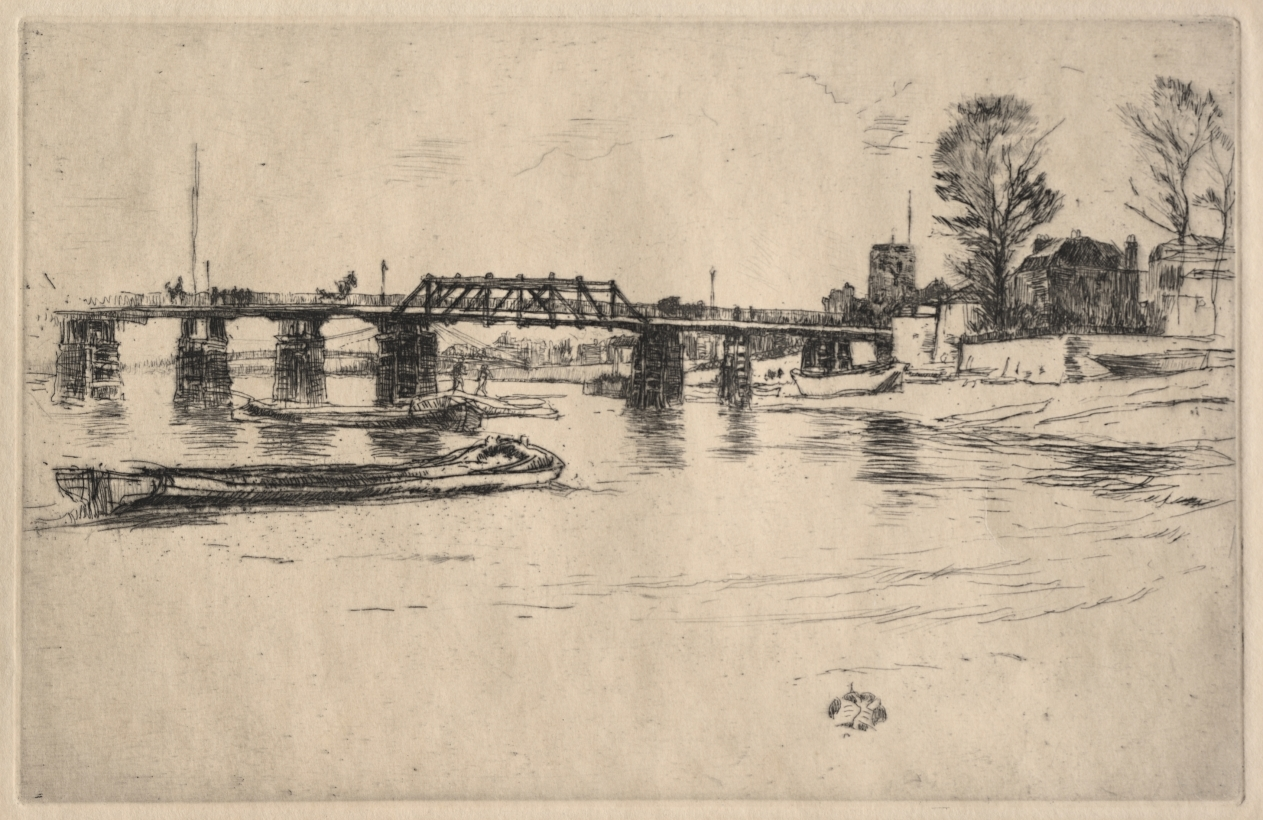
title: Fulham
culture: America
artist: James McNeill Whistler (American, 1834–1903)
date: 1878–79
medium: etching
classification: Print